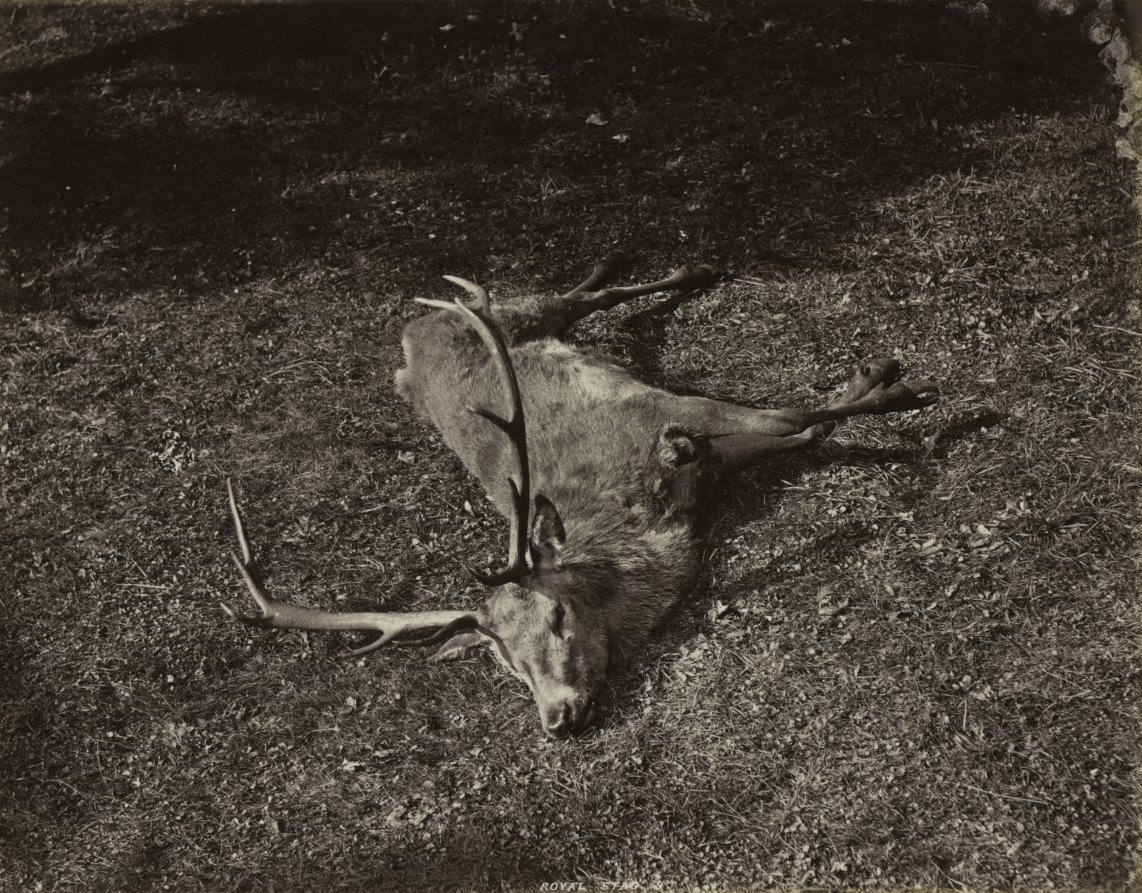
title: The Royal Stag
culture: England, 19th century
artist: James Valentine (British, 1815–1880)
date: c. 1870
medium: albumen print from wet collodion negative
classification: Photograph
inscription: Titled on negative: "Royal Stag. 9."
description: One of the earliest photographs in this exhibition, James Valentine’s Royal Stag possesses a rare spontaneity, both for photographs of this period and for still-life images in general. In photographing a royal stag (one with antlers of twelve or more branches), Valentine gave the animal the appearance of one that had just fallen in the bright light of midday. Because the technology of the day required a nearby darkroom where the exposed negative plate could be processed immediately, it is likely that the felled stag was arranged into its artistic pose by the photographer or his staff. Valentine was a distinguished topographical and landscape photographer, printer, and publisher whose Dundee-based company became the largest and best equipped in the United Kingdom. His accomplishments were recognized when in 1868 he was appointed Photographer to the Queen.